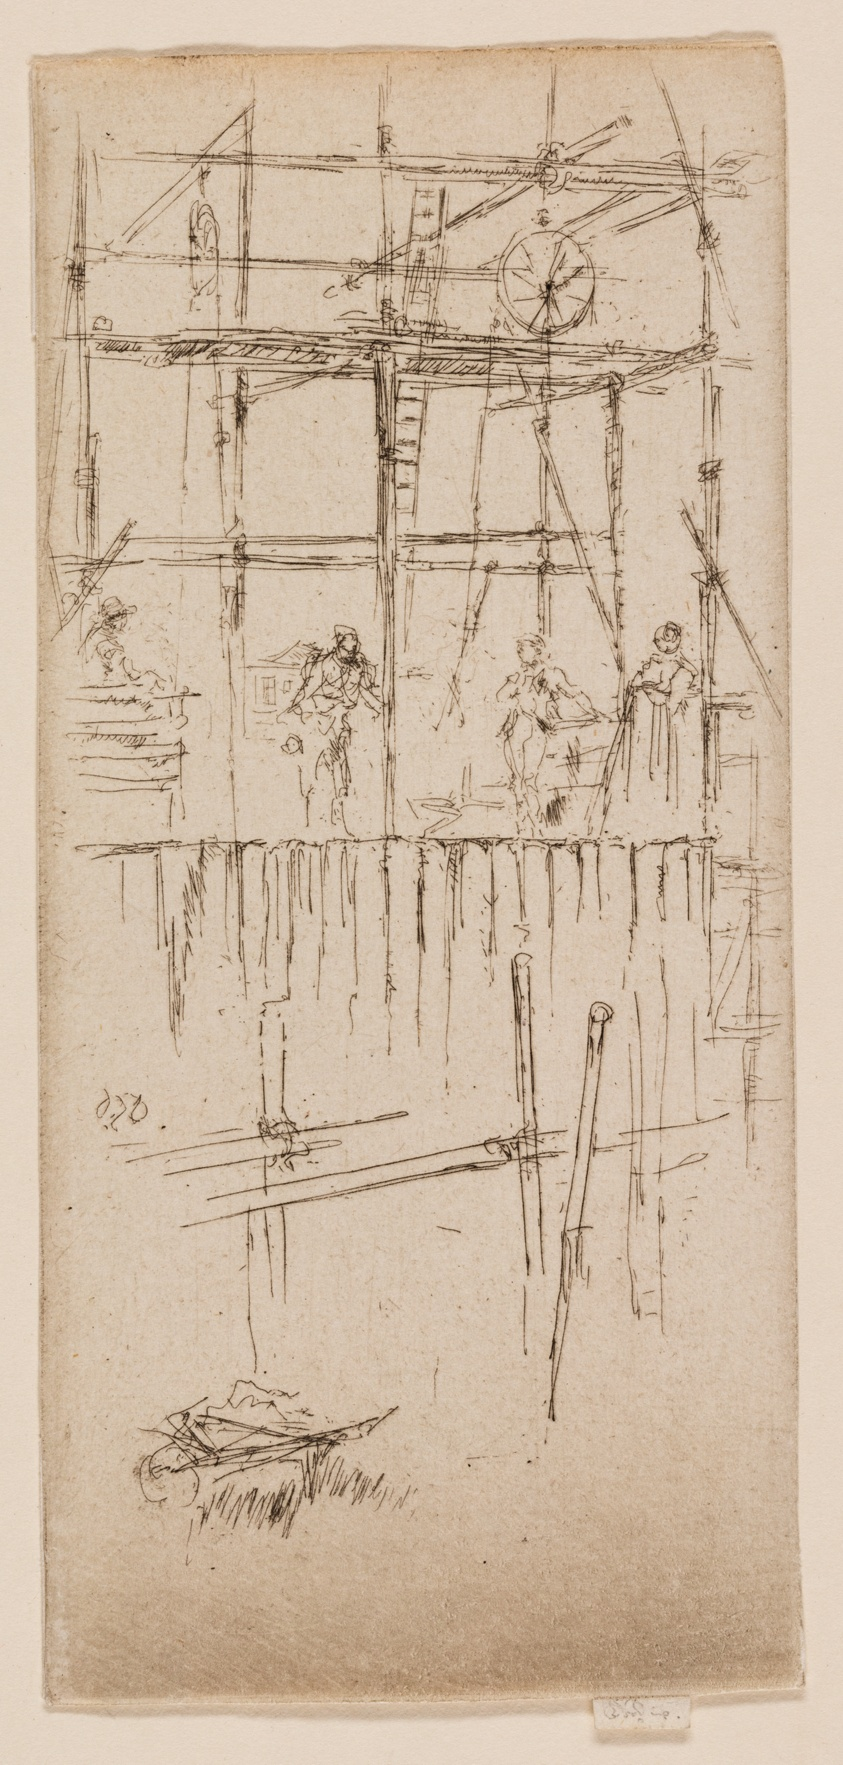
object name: Print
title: Savoy Scaffolding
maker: James McNeill Whistler (American, 1834-1903)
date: 1887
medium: Etching in black ink on off-white laid paper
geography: United States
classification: etching; print; prints and drawing; paper